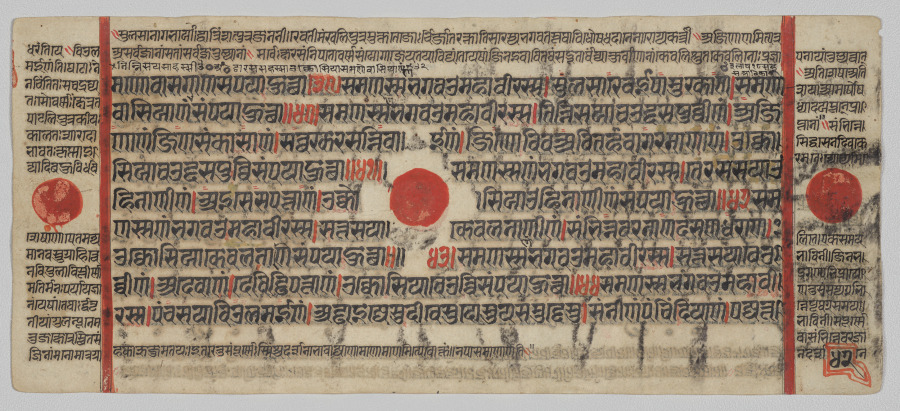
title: Text, Folio 42 (verso), from a Kalpa-sutra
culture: Western India, Gujarat, last quarter of the 15th century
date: c. 1475–1500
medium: Gum tempera, ink, and gold on paper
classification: Painting